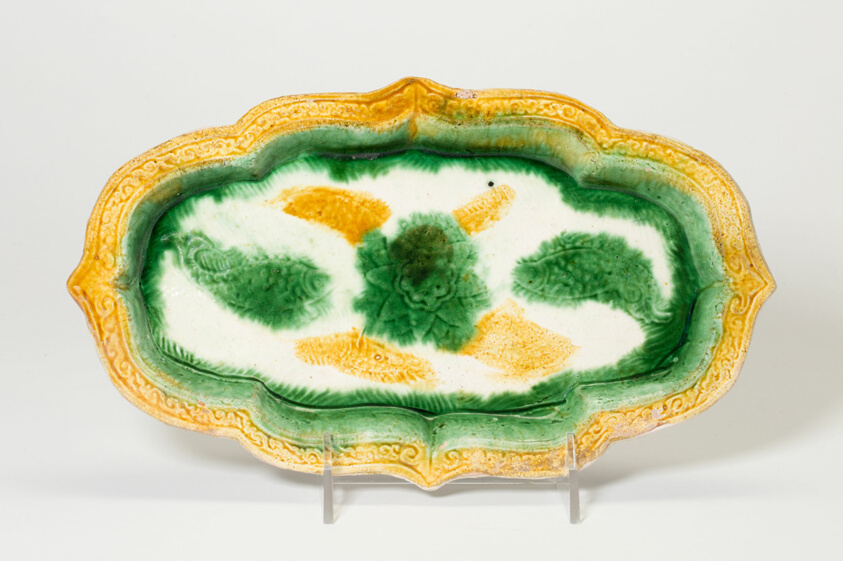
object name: Vessel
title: Elongated Foliate Dish with Fish and Central Floret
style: Chinese (culture or style)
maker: China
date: Liao (907–1124) or Jin dynasty (1115–1234), 10th/11th century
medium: Slip-coated earthenware with three color (sancai) lead glazes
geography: China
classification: dish (vessel); ceramics; asian art; vessel